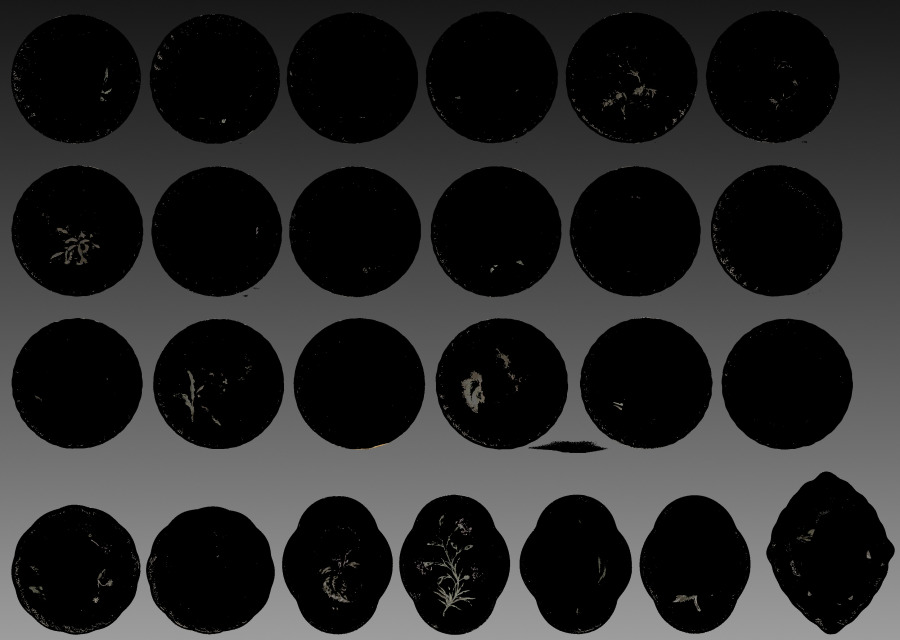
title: Dessert Service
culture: England, Derby, 18th century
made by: Derby (Crown Derby Period) (British)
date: c. 1800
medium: porcelain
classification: Ceramic